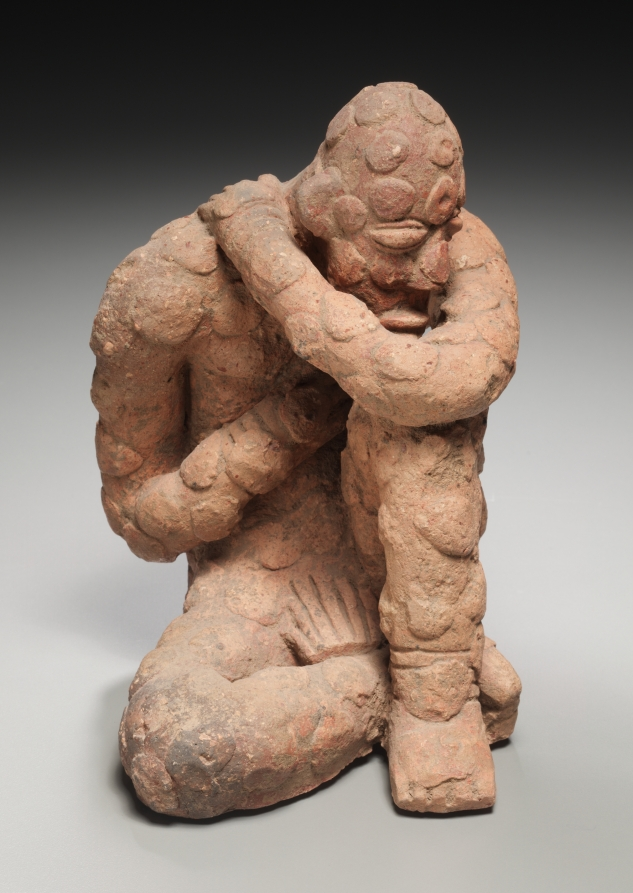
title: Male Figure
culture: Africa, West Africa, Mali, probably Djenné-Djenno, Inland Niger Delta culture-style maker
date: possibly 1300s–1600s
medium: Terracotta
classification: Sculpture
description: Figures like this would have been used in rituals by the ancestors of the present-day inhabitants of the Inland Niger Delta. Representing the gods and kings or queens associated with the region’s former residents, the figures received prayers and offerings in exchange for their support. The seated position of this male has been interpreted as a harmful pose intended to bring death to an individual.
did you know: While we don’t know who made this work, it can be hypothesized that it was a woman; today, as in much of Africa, potters in Mali are female.